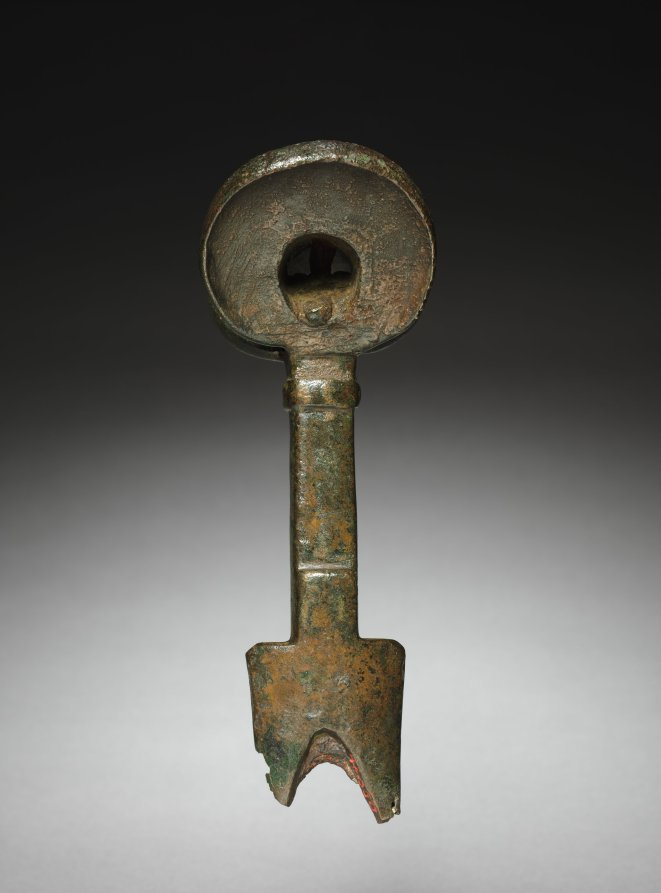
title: Sword Handle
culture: Iran, Luristan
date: 2000–1000 BCE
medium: bronze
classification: Metalwork